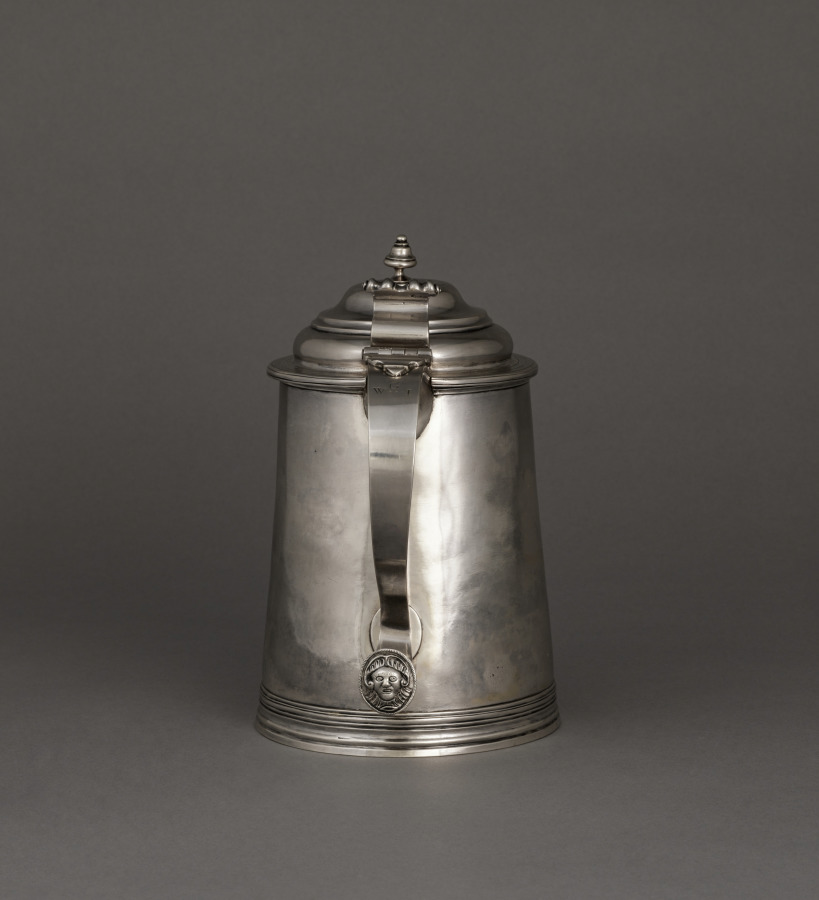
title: Tankard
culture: America, Rhode Island, Exeter and South Kingston, 18th century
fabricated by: Samuel Casey (American, c. 1724–c. 1780)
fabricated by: Thomas Arnold (American, 1734–1828)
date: c. 1750–1770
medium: silver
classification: Silver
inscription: engraved "G" over "W * I" in block letters on top of handle.